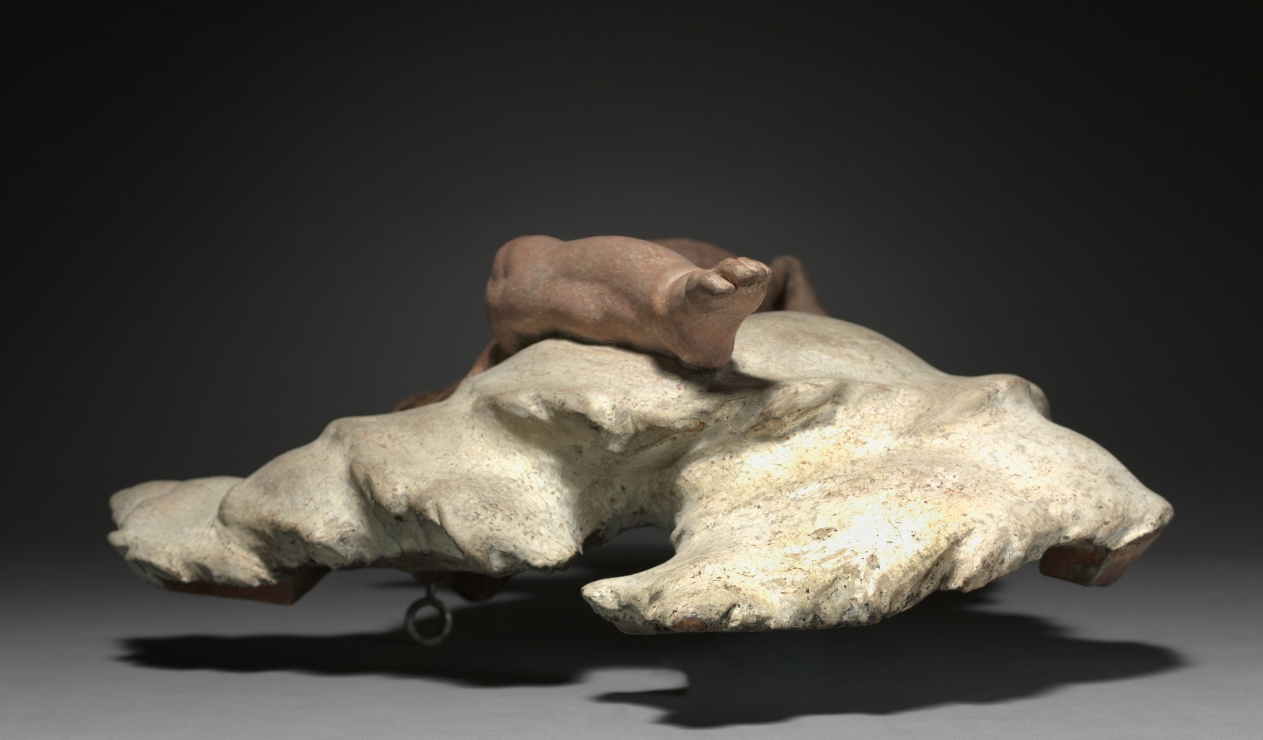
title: Putto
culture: Germany, Munich, 18th century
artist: workshop of Ignaz Günther (German, 1725–1775)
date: c. 1760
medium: painted and gilded wood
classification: Sculpture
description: This charming winged putto reclines on a cloud, hands clasped in an attitude of adoration. It is probably a fragment of a large decorative scheme of a church, perhaps the Johanneskirchen near Munich.